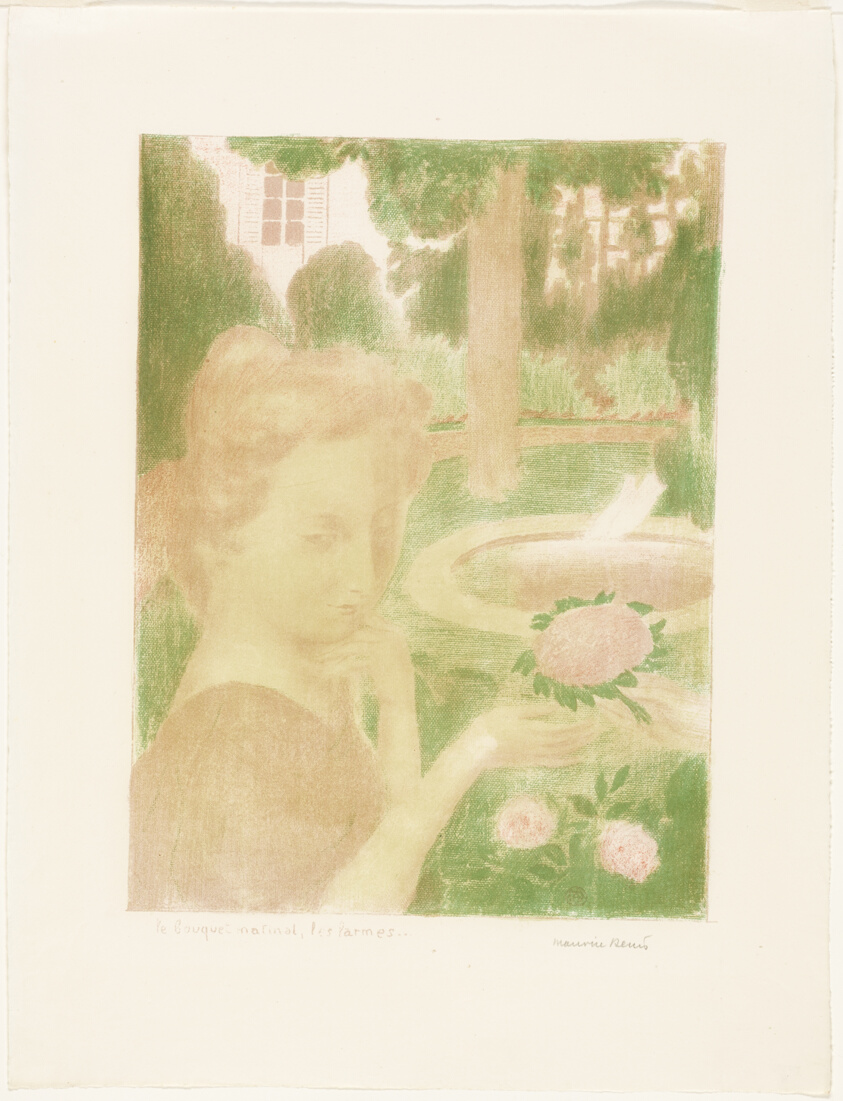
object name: Print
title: The Morning Bouquet, Tears, plate three from Love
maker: Maurice Denis (French, 1870-1943); published by Ambroise Vollard (French, 1867-1939)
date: 1898, published 1899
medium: Lithograph in pale pink, green, and pale green on light ivory wove paper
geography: France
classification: lithograph; print; prints and drawing